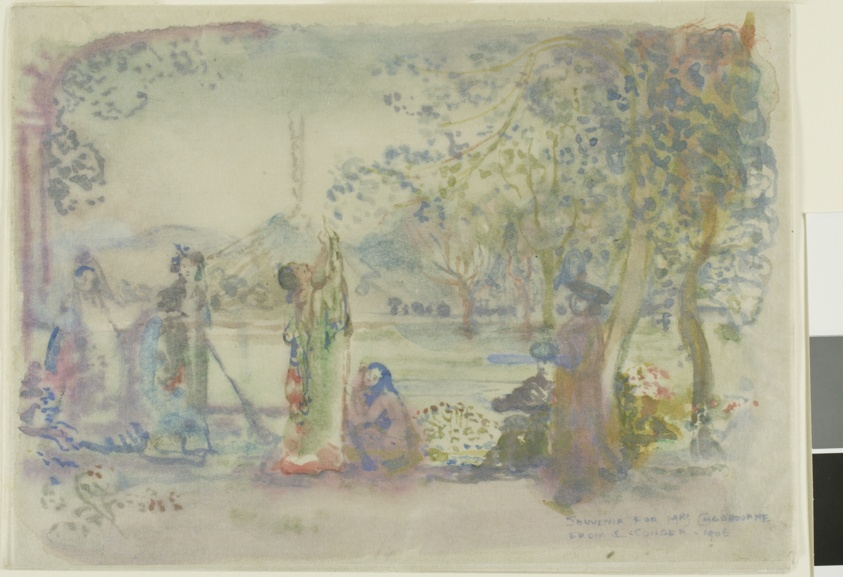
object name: Drawing and Watercolor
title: Scene on a Lake in the Morning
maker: Charles Conder (English, 1868-1909)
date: 1906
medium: Watercolor on gouache, on Japanese paper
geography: England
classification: watercolor; drawings (visual works); prints and drawing